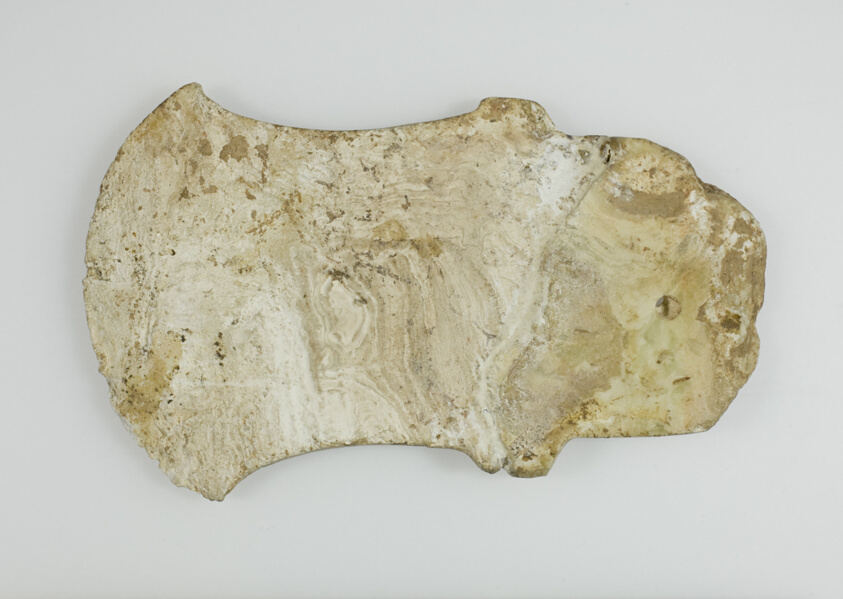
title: Axe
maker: China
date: Shang dynasty (c. 1600–c. 1046 B.C.)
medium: Jade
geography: China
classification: jade; asian art